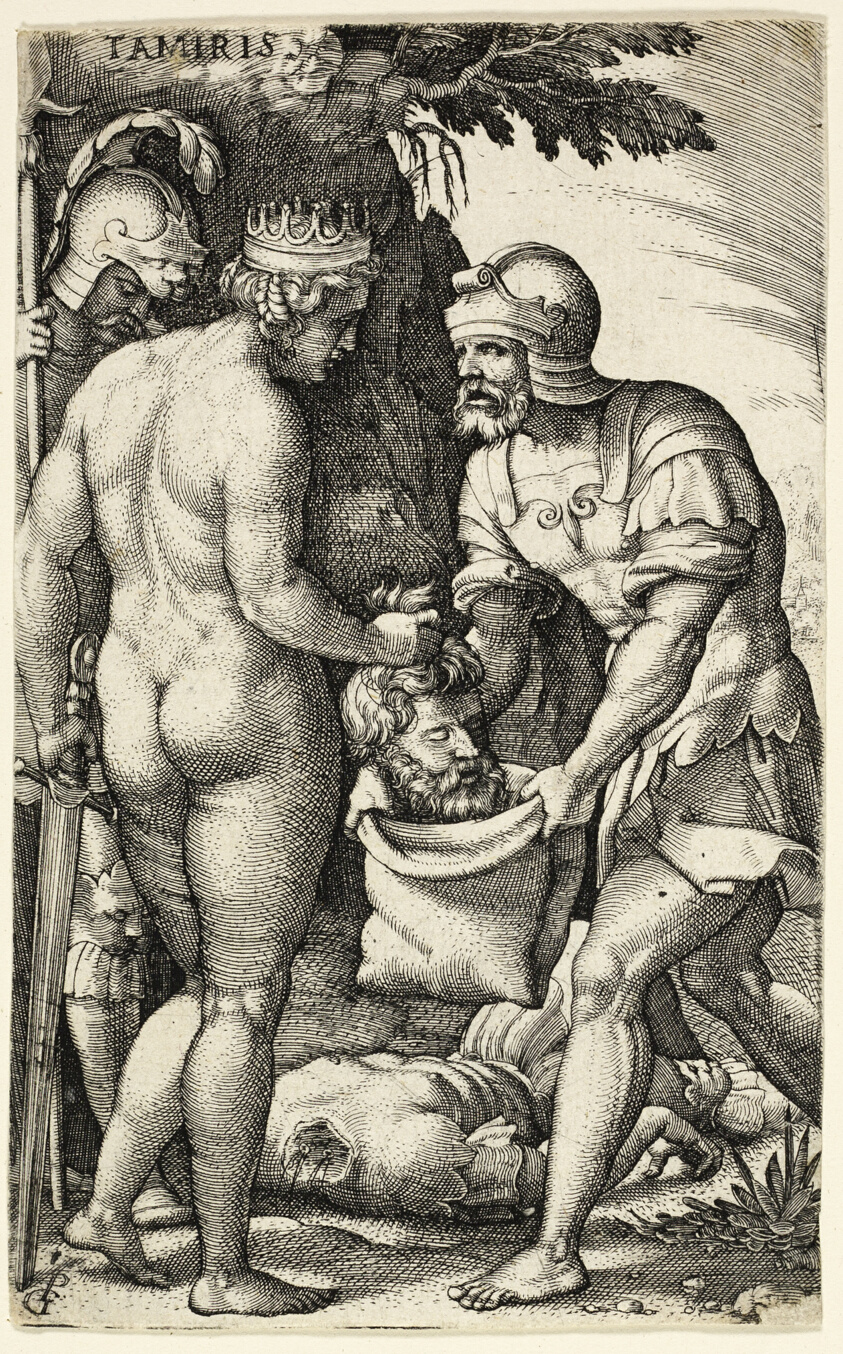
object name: Print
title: Tamiris, from Greek Heroines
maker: Georg Pencz (German, c. 1500-1550)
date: c. 1539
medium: Engraving in black on ivory laid paper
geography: Germany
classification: engraving; print; prints and drawing